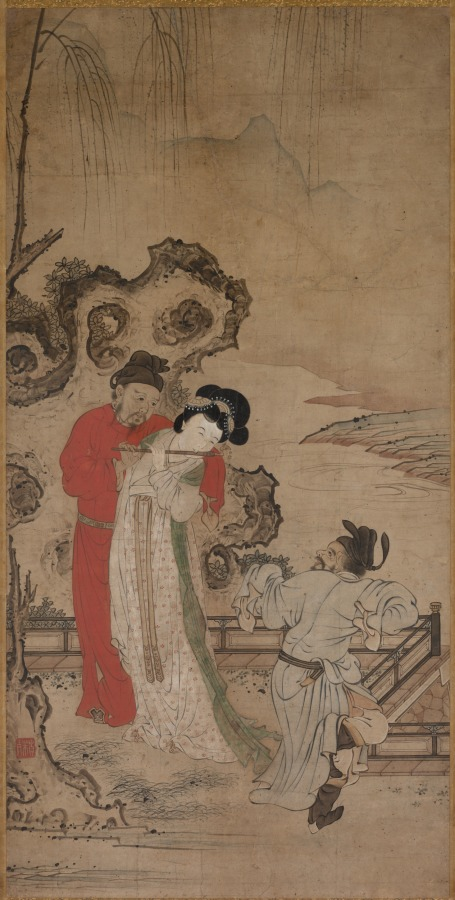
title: Emperor Minghuang Teaching Yang Gueifei to Play the Flute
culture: Japan, Muromachi period (1392–1573)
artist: Choryusai (Japanese)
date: late 1400s–early 1500s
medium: hanging scroll; ink and color on paper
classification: Painting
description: Minghuang, a prominent emperor of Tang (618-906) China and his consort, Yang Gueifei, have inspired many legends, paintings, and poetry in later Chinese culture. Through the study of Chinese literature and the collecting of Chinese paintings, tales of their lives and romance became well-known in Muromachi Japan.